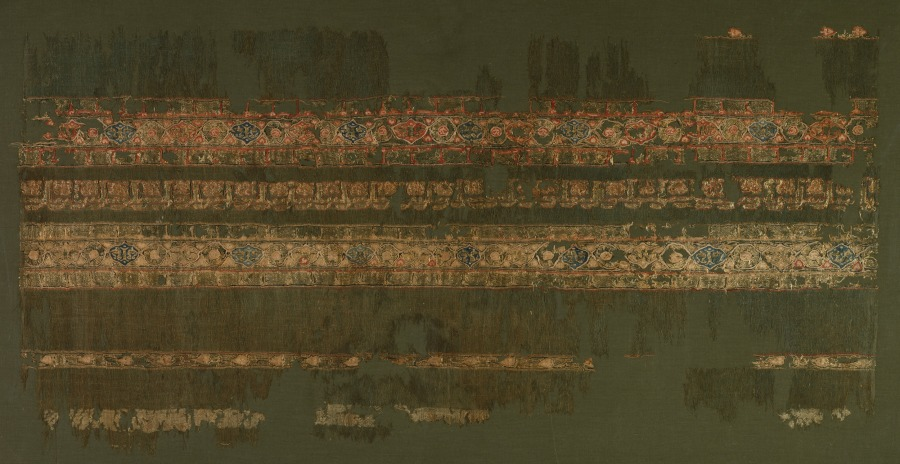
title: Tiraz with gold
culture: Egypt, Fatimid period, reign of Caliph al-Musta‘lī, 1094–1101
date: 1094–1101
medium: plain weave with inwoven tapestry weave: linen, silk, and gold filé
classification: Textile